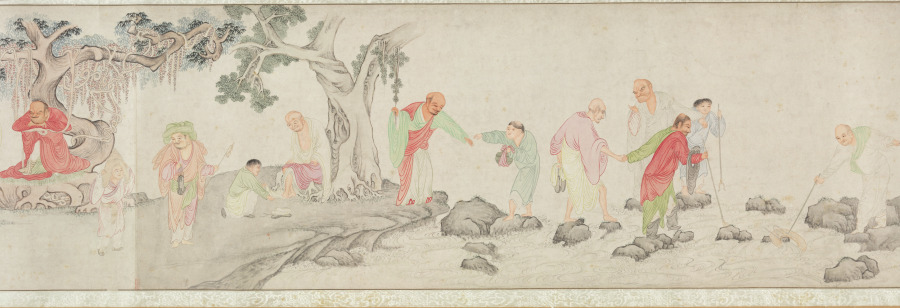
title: The Five Hundred Arhats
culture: China, Ming dynasty (1368–1644)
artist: Wu Bin (Chinese, active c. 1591–1626)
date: 1591–1626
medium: Handscroll; ink and color on paper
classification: Painting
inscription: 枝隱頭陀吳彬齋心拜寫 [印]吳彬之印; 文中父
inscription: 7 seals of Qianlong emperor (r. 1736–95): Gu xi tian zi 古希天子; Shou 壽; Qianlong jian shang 乾隆鑑賞; San xi tang jing jian xi 三希堂精鑑璽; Yi zi sun 宜子孫; Tai shang huang di zhi bao 太上皇帝之寳; Qian qing gong bao 乾清宮寶.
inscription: 6 seals of Cheng Qi 程琦 (1911–1988): Ke an geng zi wu shi yi hou suo de ming ji 可菴庚子五十以後所得名跡; 5 other Cheng Qi seals.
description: More than 66 feet long, this handscroll depicts 447 luohans, 72 attendants, and the bodhisattva of compassion at its very end. Luohans (arhats in Sanskrit), disciples of the Buddha and protectors of the Buddha’s law, possess supernatural powers and take on myriad external appearances. The amusing assortment of characters are engaged in an array of religious, secular, and miraculous activities. The painter used stylistic features borrowed from earlier artists, carefully controlled lines, and refined coloring. Wu Bin was a lay Buddhist and depicting this sort of image was part of a religious practice seeking understanding of the Buddha’s teaching.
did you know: Far advanced on the path to enlightenment, arhats have the capacity to tame tigers, free dragons, and to float on water or in the air.